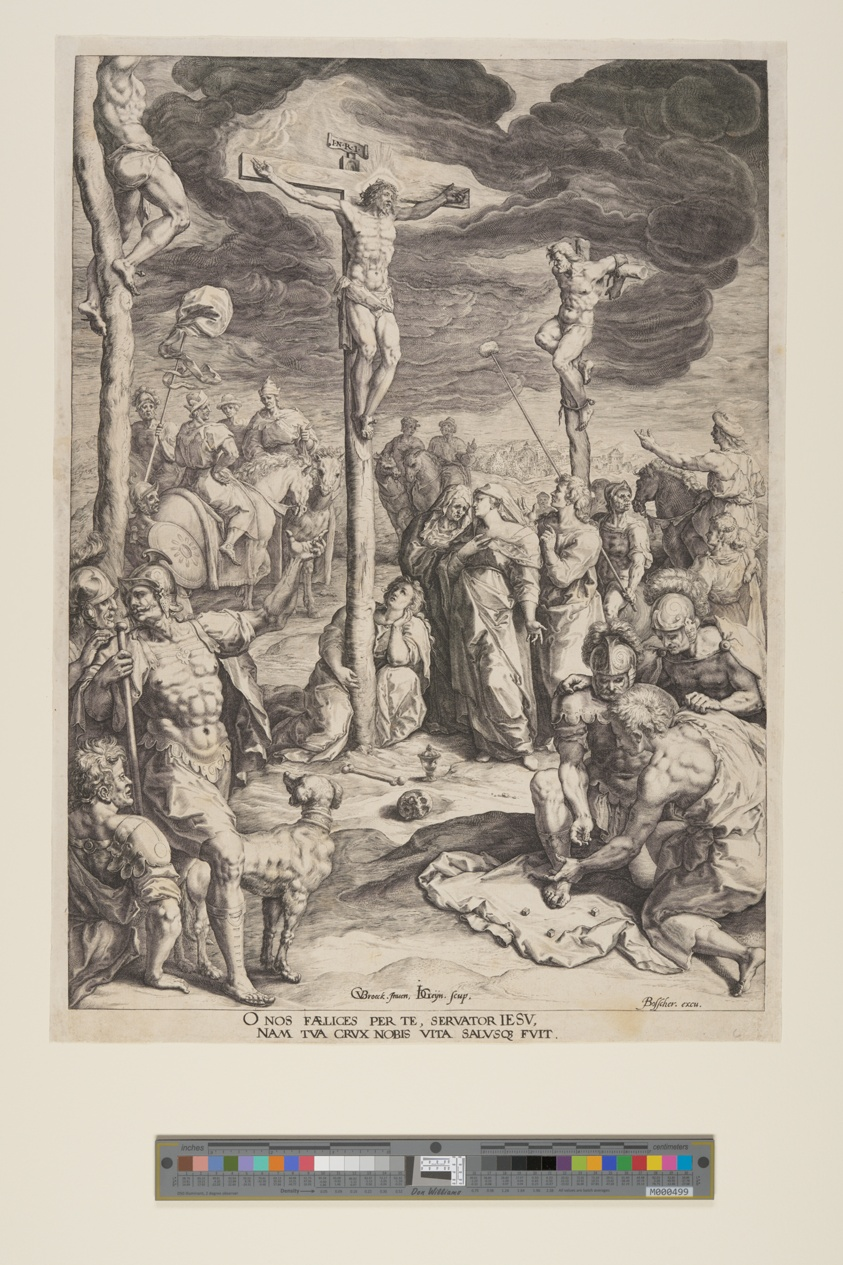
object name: Print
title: Christ on the Cross between Two Thieves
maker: Jacques de Gheyn II (Dutch, 1565–1629); after Crispin van den Broeck (Netherlandish, 1524–c.1590)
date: c. 1590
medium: Engraving on ivory laid paper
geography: Netherlands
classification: engraving; paper; print; prints and drawing